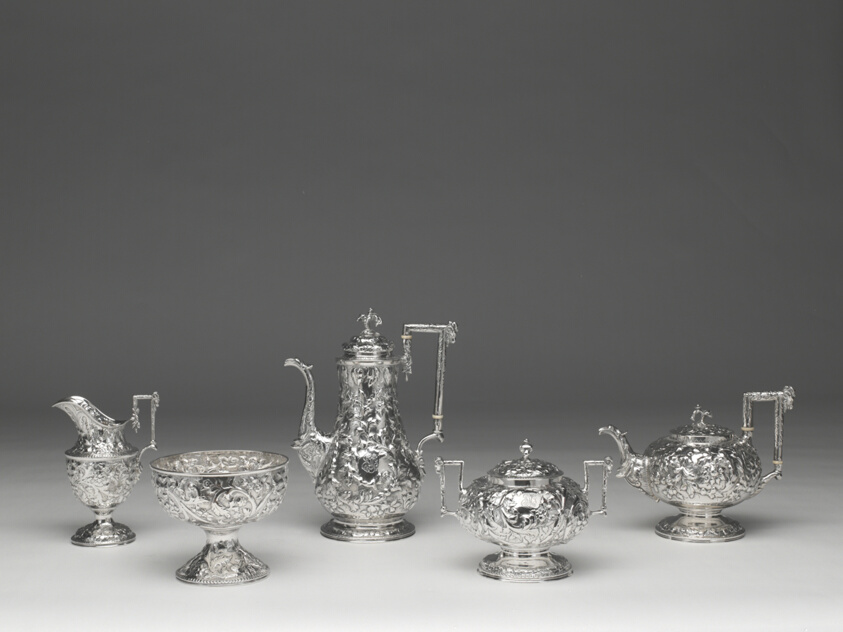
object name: Metalwork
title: Tea and Coffee Service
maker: Samuel Kirk & Son (American, 1846–1861); or Samuel Kirk & Sons (American, 1861–1868); Baltimore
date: 1846–68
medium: Silver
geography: Baltimore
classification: tea service; silver; american decorative arts; american arts; decorative arts